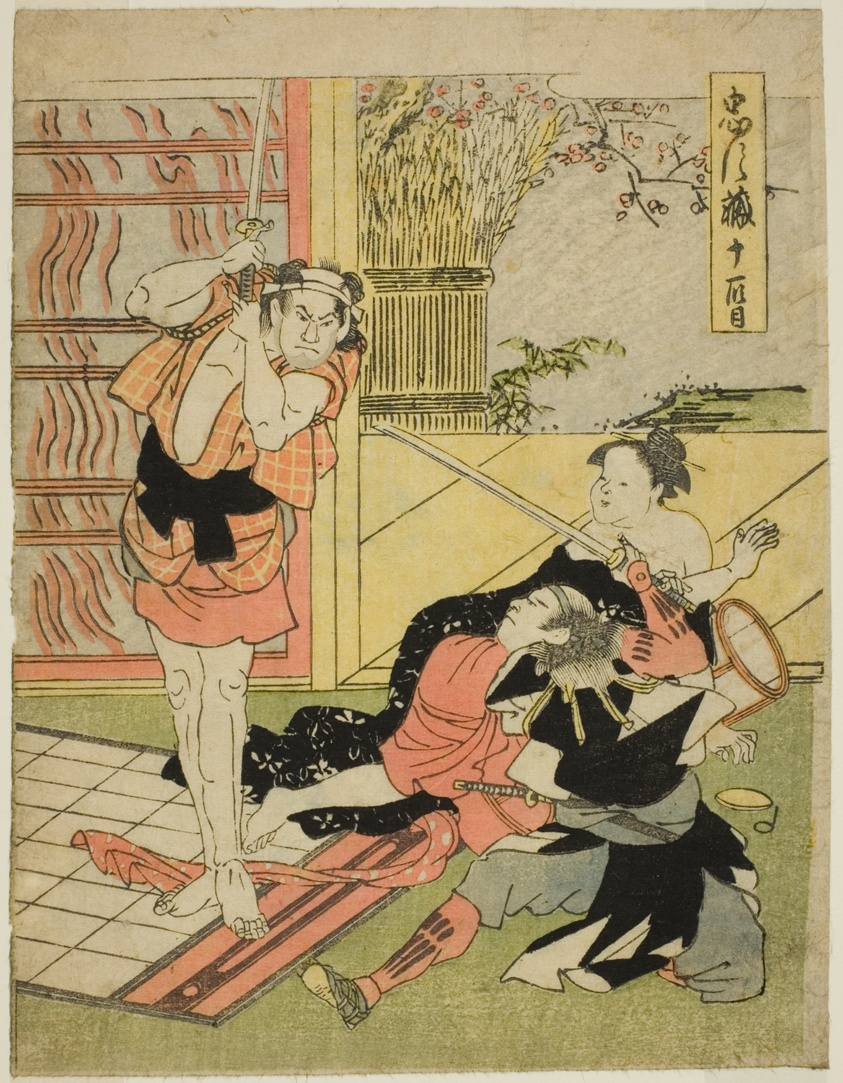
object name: Print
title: Act Eleven: Night Raid on Moronao's Mansion from the play Chushingura (Treasury of Forty-seven Loyal Retainers)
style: Japanese (culture or style)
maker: Katsukawa Shun'ei (Japanese, 1762-1819)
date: c. 1795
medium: Color woodblock print; koban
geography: Japan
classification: woodblock print; print; asian art